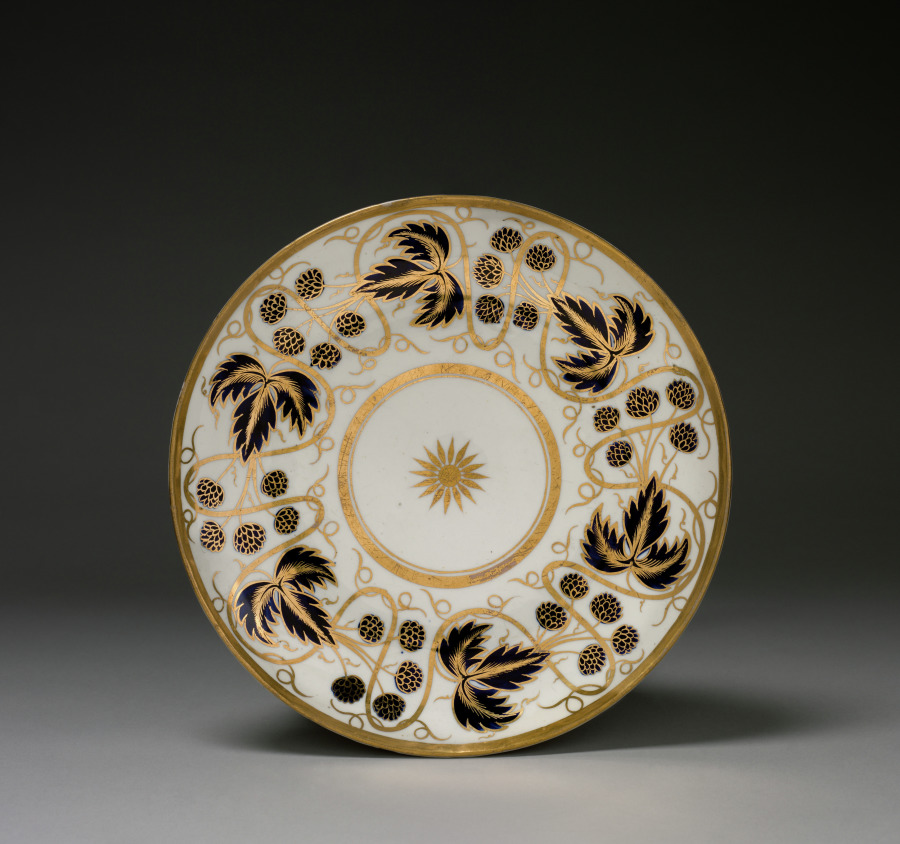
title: Saucer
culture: England, late 18th century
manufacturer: Worcester Porcelain Factory (British, established 1751)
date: late 1700s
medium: porcelain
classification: Ceramic